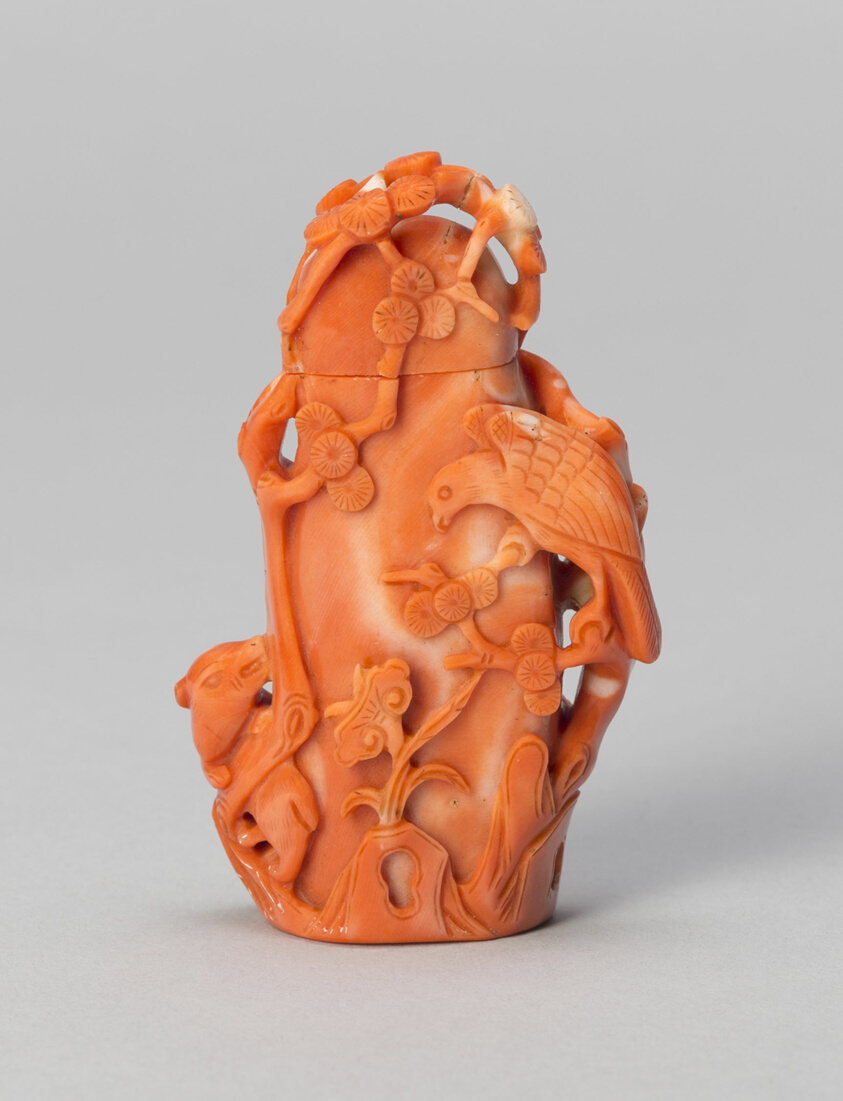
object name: Vessel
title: Tree-Shaped Snuff Bottle with a Hawk and Bear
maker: China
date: Qing dynasty (1644–1911), 1850–1900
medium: Coral with carved decoration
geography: China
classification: snuff bottle; asian art; vessel